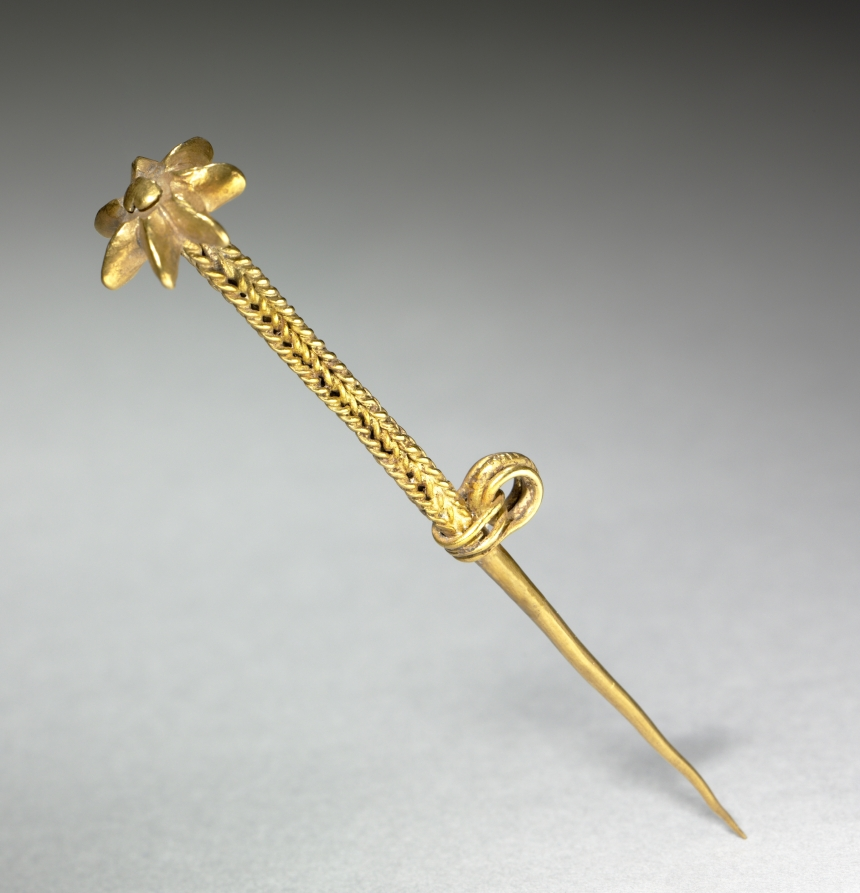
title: Toggle Pin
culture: Cyprus, late Cypriot II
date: c. 1300s BCE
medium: gold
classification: Jewelry